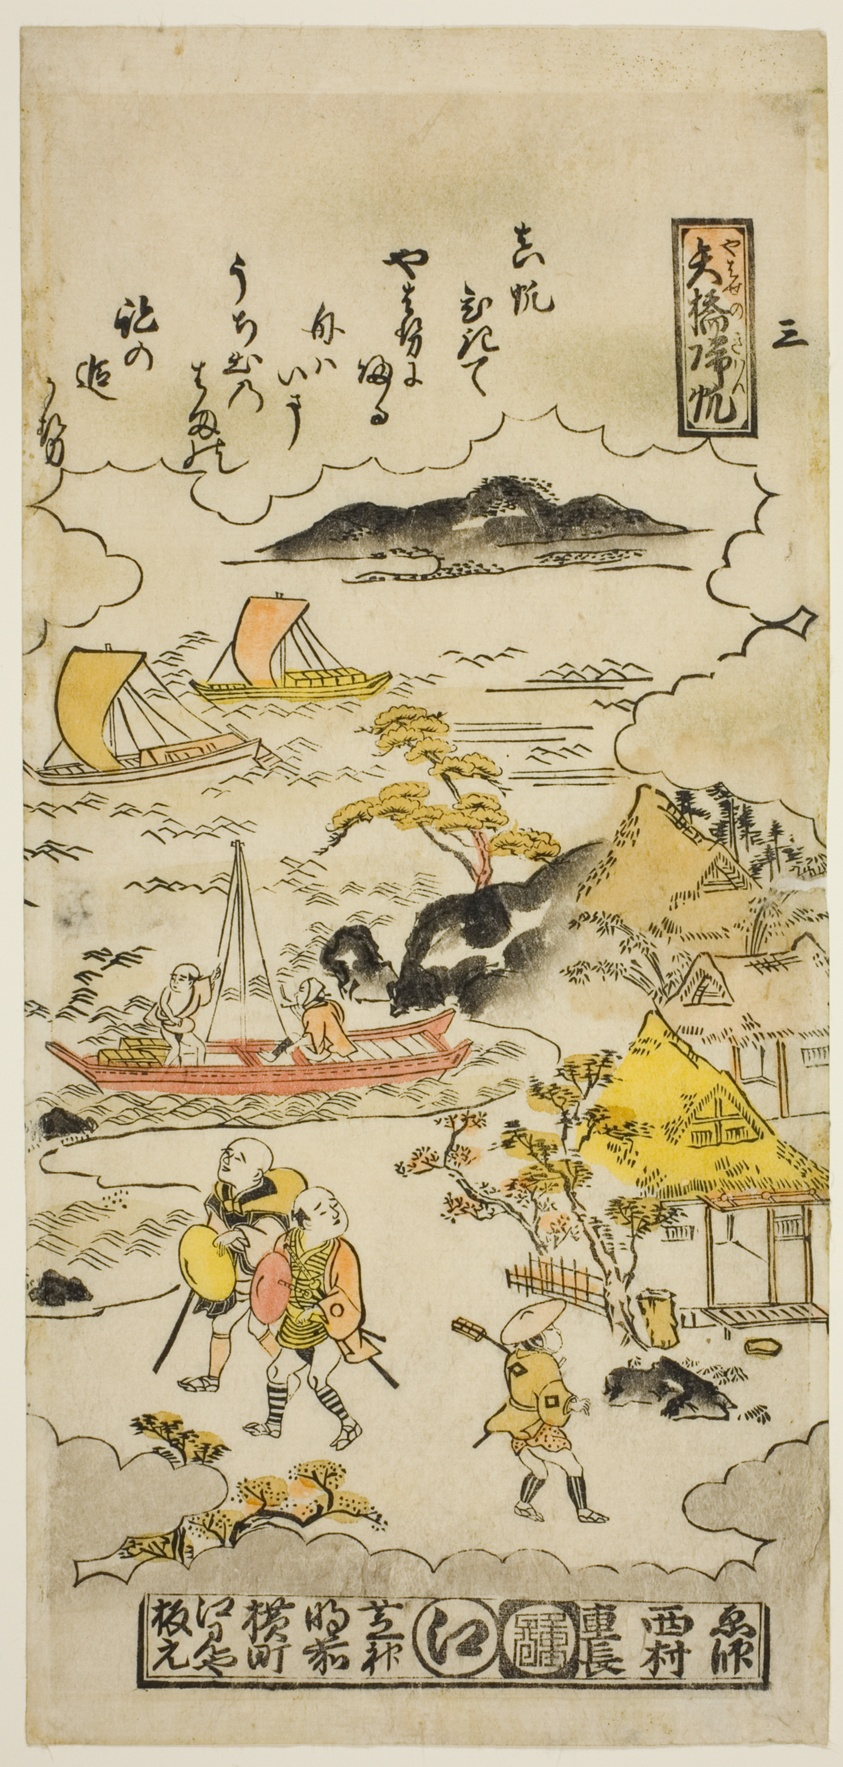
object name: Print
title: Returning Sails at Yabase (Yabase no kihan), No. 3 from the series "Eight Views of Omi"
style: Japanese (culture or style)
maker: Nishimura Shigenaga (Japanese, 1697 (?)-1756)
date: c. 1716/36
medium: Hand-colored woodblock print; hosoban, urushi-e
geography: Japan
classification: woodblock print; print; asian art